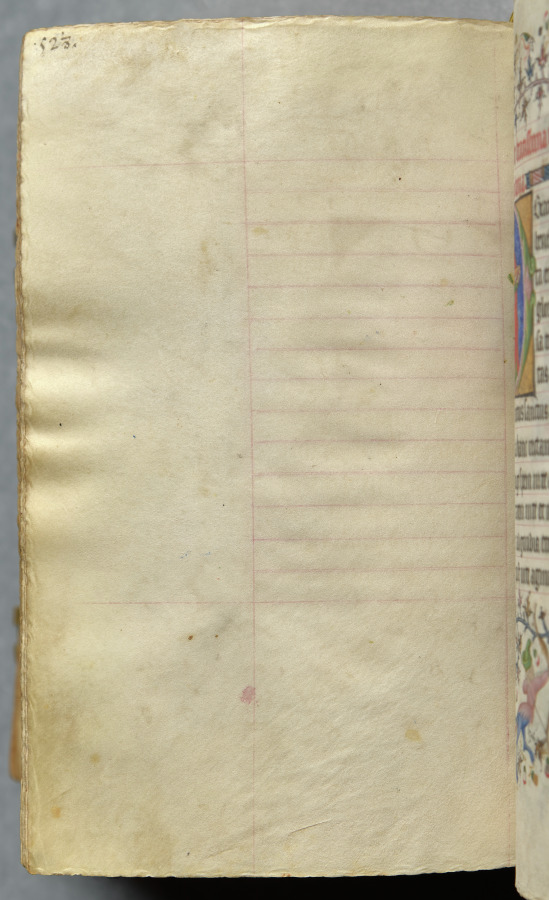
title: Hours of Charles the Noble, King of Navarre (1361-1425): fol. 258v, Text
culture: France, Paris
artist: Master of the Brussels Initials and Associates (French)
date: c. 1405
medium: ink, tempera, and gold on vellum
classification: Bound Volume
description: This precious volume was obviously highly prized by its owner, the French-born King of Navarre, who had his coat of arms painted on no less than twenty folios. Rather than directly commissioning this manuscript from a specific workshop, it seems that Charles the Noble acquired his book of hours -- perhaps ready-made for the luxury market -- while on a trip to Paris in 1404-05. A collaborative effort, six painting styles are evidenced within the pages of this codex, those of two Italians, two Frenchmen, and two Netherlanders. The painter who was responsible for the planning and decoration of the book, and who produced seventeen of the large miniatures, was a Bolognese artist known as the Master of the Brussels Initials. His principal assistant, responsible for most of the borders, was a Florentine who signed his name "Zecho" da Firenze on folio 208 verso.